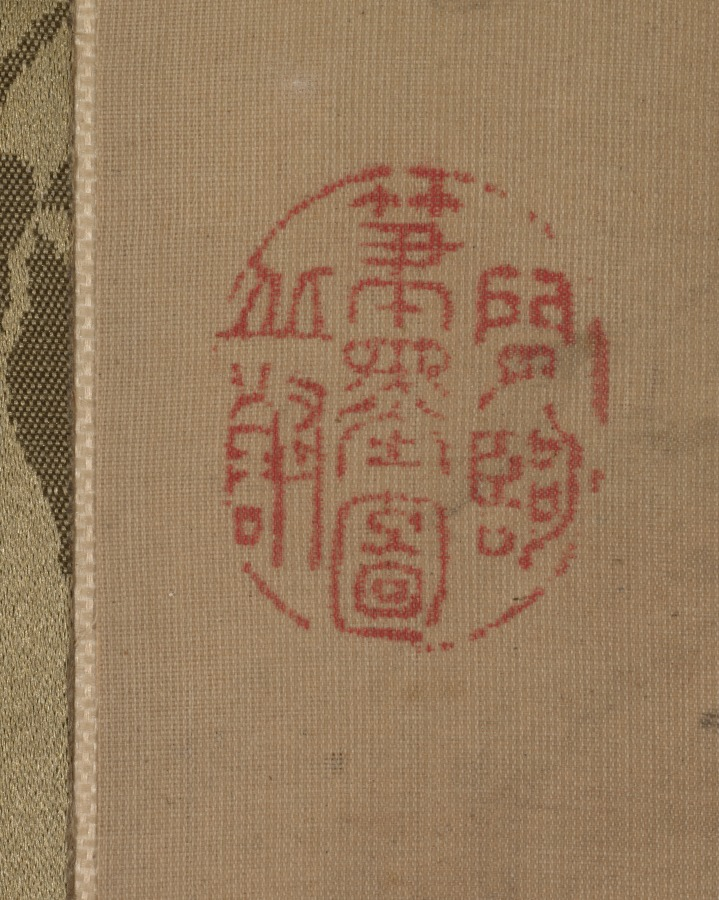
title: Sunset over Autumn Mountains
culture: Japan, Edo period (1615–1868)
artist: Hoashi Kyōu (Japanese, 1810–1884)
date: 1869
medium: hanging scroll; ink and light color on silk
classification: Painting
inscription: translation of poem [by Nora Liu]: The way was forgotten while enjoying the conversation and colors of Autumn, The road entered among the red trees and the white clouds, The trace of a path led to the lonely temple where the monks received enlightenment, The sound of chimes echo remotely in the mountains where the sunset falls. In the year 1869, Kyou